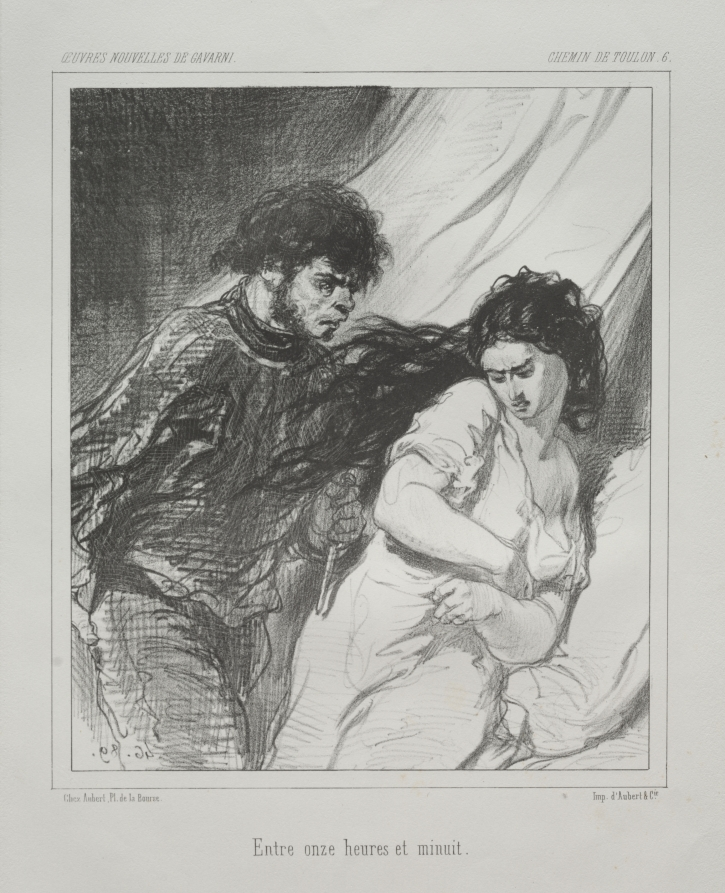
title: Chemin de Toulon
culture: France, 19th century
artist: Paul Gavarni (French, 1804–1866)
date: c. 1846–47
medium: lithograph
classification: Print